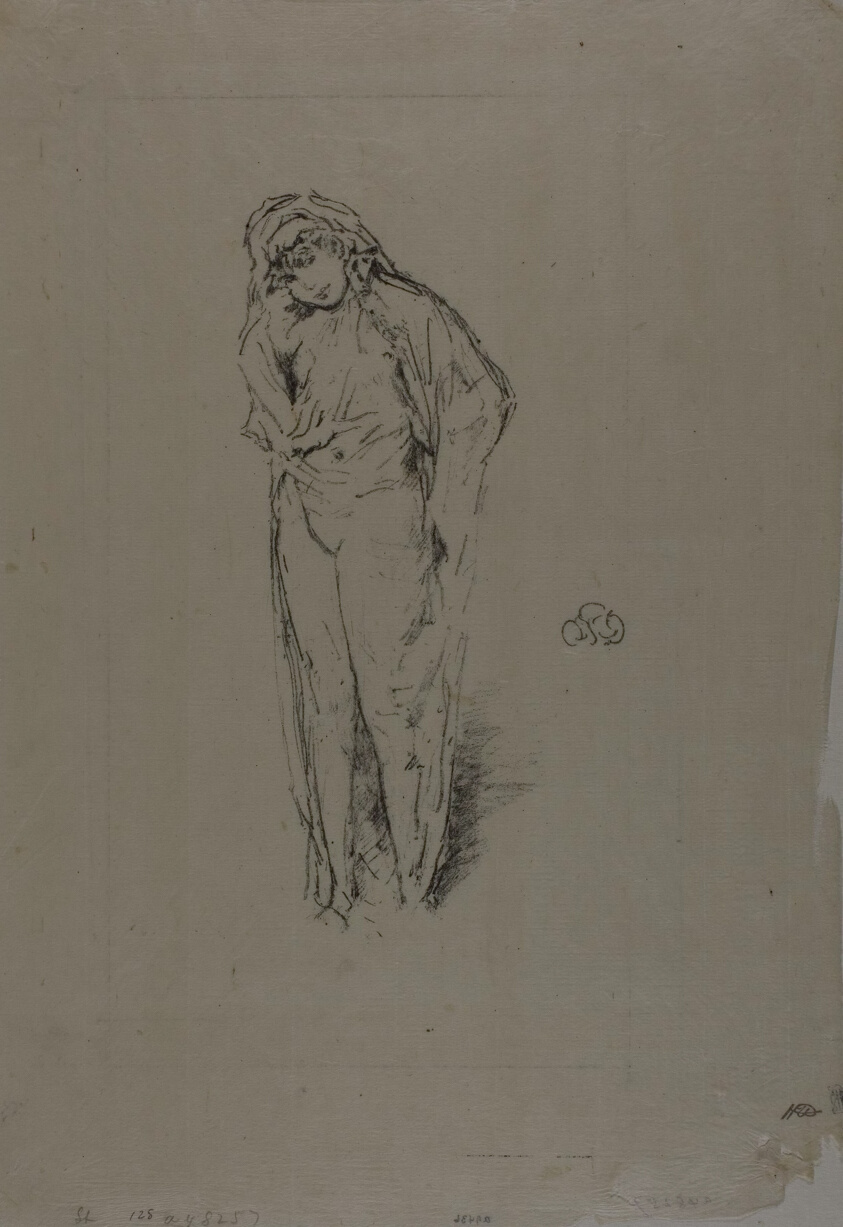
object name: Print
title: Draped Figure, Standing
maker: James McNeill Whistler (American, 1834-1903)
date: 1891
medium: Transfer lithograph in black on cream Japanese gampi paper hinged at top margin to cream laid Japanese paper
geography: United States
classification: transfer lithograph; lithograph; print; prints and drawing; paper